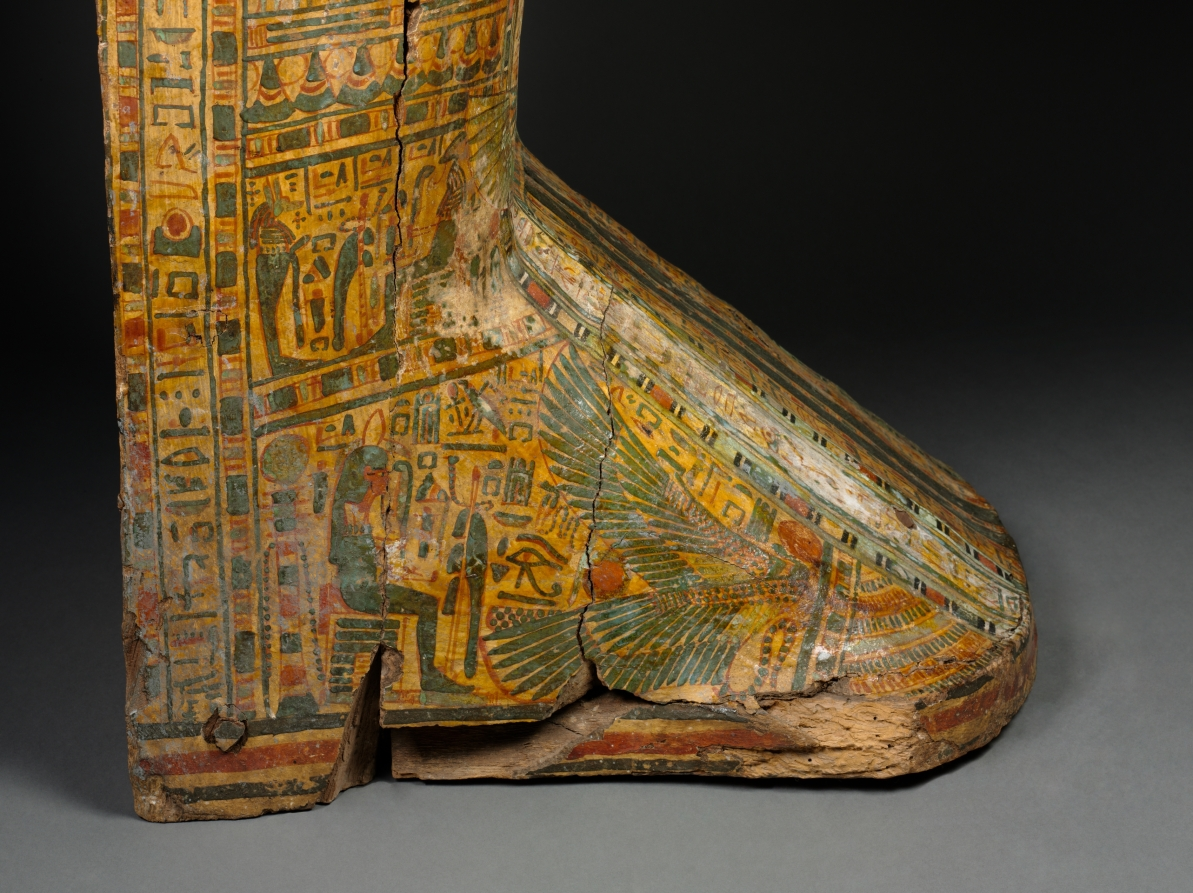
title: Coffin of Nesykhonsu (lid)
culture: Egypt, Third Intermediate (1069–715 BCE), Dynasties 21–22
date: c. 976–889 BCE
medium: gessoed and painted sycamore fig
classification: Funerary Equipment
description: A complete set of coffins during the late New Kingdom and Third Intermediate Period consisted of an outer and inner coffin and a mummy board (essentially a lid without a case, placed directly over the wrapped mummy). Judging by its size, this must have been Nesykhonsu's outer coffin. The type is essentially the same as the coffin of Bakenmut, which was also an outer coffin. The two coffins are said to have been found together and to have belonged to a man and wife. This is quite possible, although the inscriptions do not bear it out. Bakenmut is not mentioned on Nesykhonsu's coffin, nor is she mentioned on his. There was by this time a tremendous repertoire of scenes appropriate for coffin decoration. Whereas Bakenmut's coffin features images of deified dead pharaohs, Nesykhonsu's is decorated in a more personal way with scenes from her own funeral. The main scene in the interior (near the top) shows a priest clad in a panther skin with the mummy of Nesykhonsu behind. The god appears in mummy form and wears a sun disk on his head. The scarab beetle inside the sun disk identifies him as Khepri, the morning sun, and the hieroglyphs to the right identify him as Atum, the evening sun. Taken together, image and text represent the sun god in both his rising and setting, youthful and aged aspects.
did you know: Two of Nesykhonsu's titles, "Lady of the House" and "Singer of the Choir of Mut the Great," are written on the outside of the coffin.